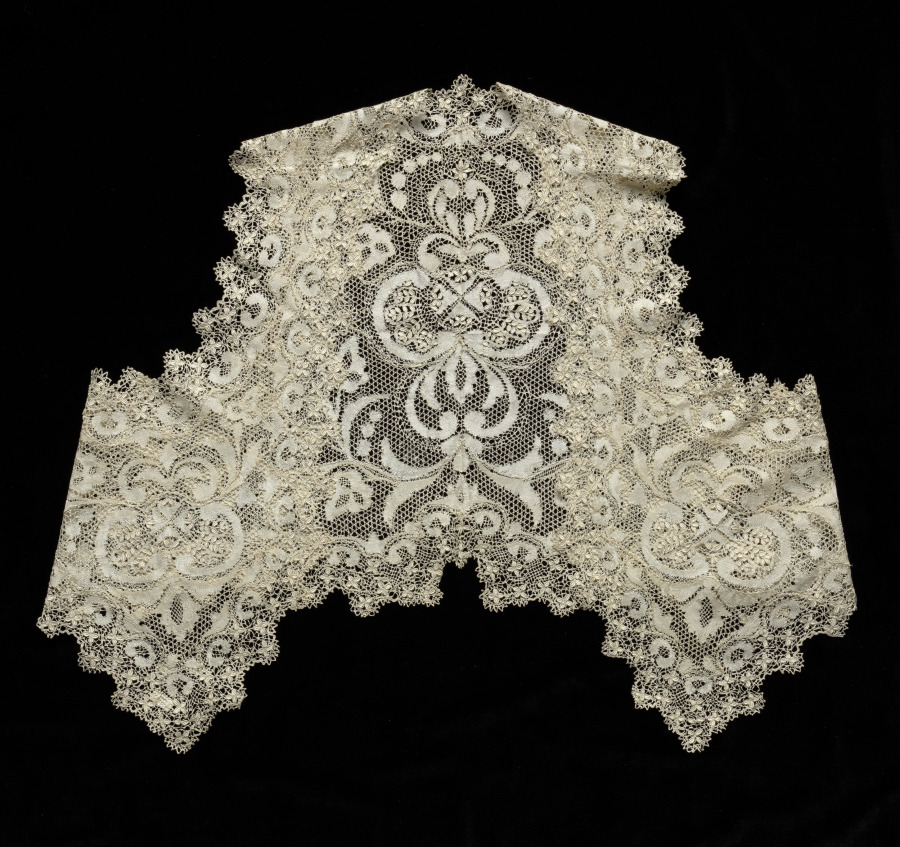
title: Bolero Style Lace Jacket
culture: Malta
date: 1800s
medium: Silk: bobbin lace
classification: Lace